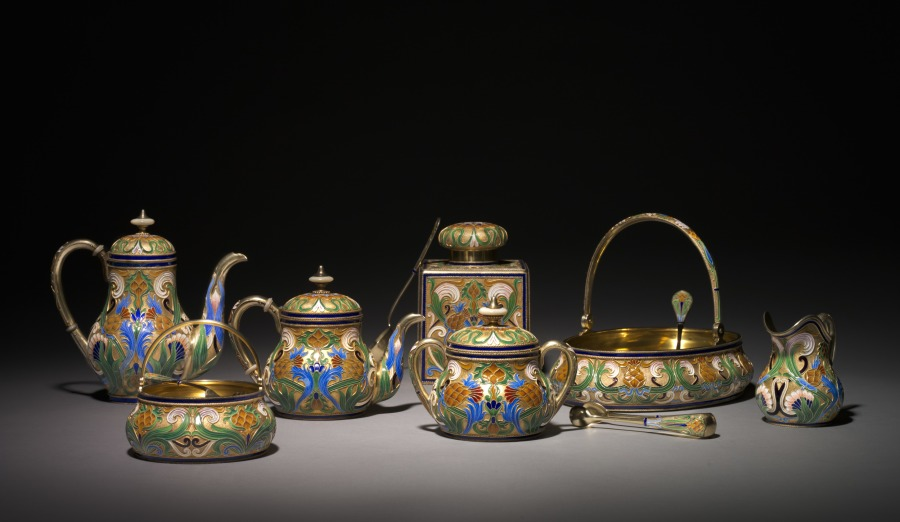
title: Tea Service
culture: Russia, St. Petersburg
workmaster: attributed to Feodor Ivanovich Rückert (Russian, 1840–1917)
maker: House of Fabergé (Russian, 1842–1918)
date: 1887–96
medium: silver gilt, opaque cloisonné enamel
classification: Miscellaneous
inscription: Various marks.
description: Fabergé’s craftsmen in Moscow, especially under the watchful eye of workmaster Feodor Rückert, became known for their work in the pan-Slavic or neo-Russian style, hearkening back to 17th-century motifs of Russian folk art. Often on rather conventional shapes, Rückert and his silversmiths created an explosion of color, achieved through the historic technique of cloisonné enamel in which tiny metal lines are soldered to the surface then filled with glass powders in various colors and fired to create a high gloss finish. The result is a spectacular evocation of the 17th-century originals. Far from mere copies, however, Rückert's designs, such as this tea service, employ naturalistic or abstract motifs in a thoroughly modern adaptation of a remarkable earlier period of Russian art and decoration.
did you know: This tea service still retains its large wooden presentation box.